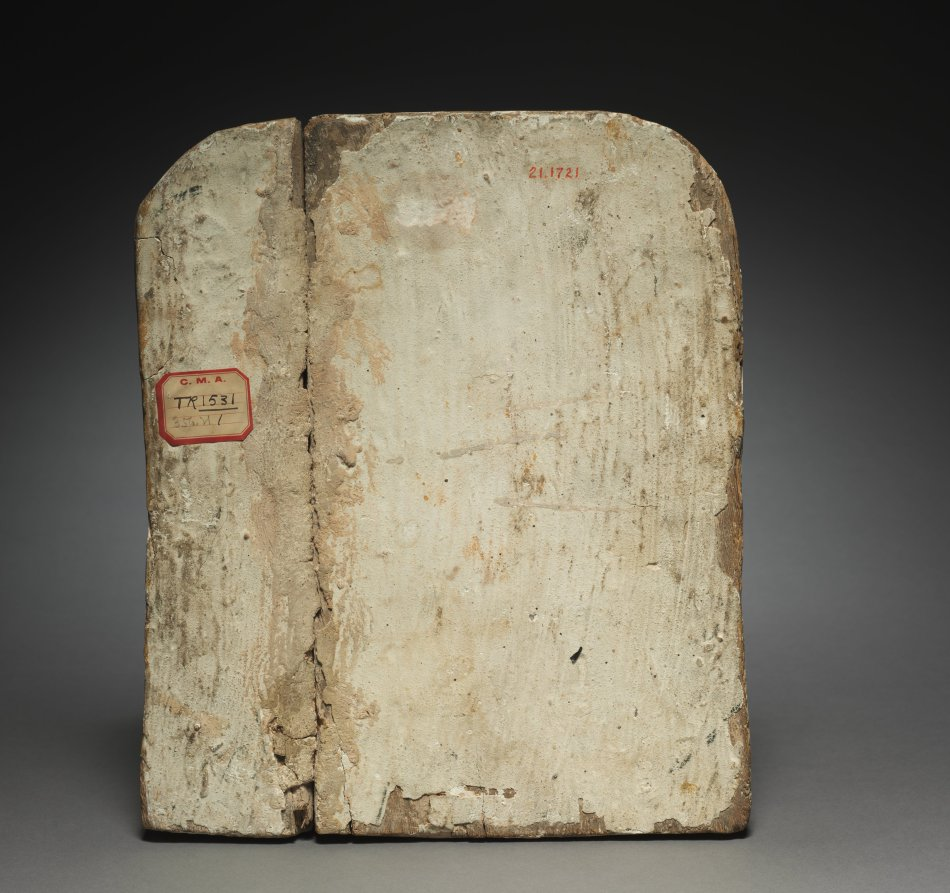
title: Tomb Stele of Nesptah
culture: Egypt, Late period (715–332 BCE), Dynasty 26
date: 664–525 BCE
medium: painted wood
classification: Funerary Equipment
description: A winged sun disk with pendant uraei (cobras) arches across the top of this funerary stele. The central scene depicts the deceased (at the right) being ushered by Thoth into the presence of the funerary gods. Led by Osiris and Ra-Horakhty, these gods are Isis, Nephthys, and the Four Sons of Horus. The tiny squares above them were intended for brief inscriptions naming each god, but the names were omitted, doubtless because of a lack of space.